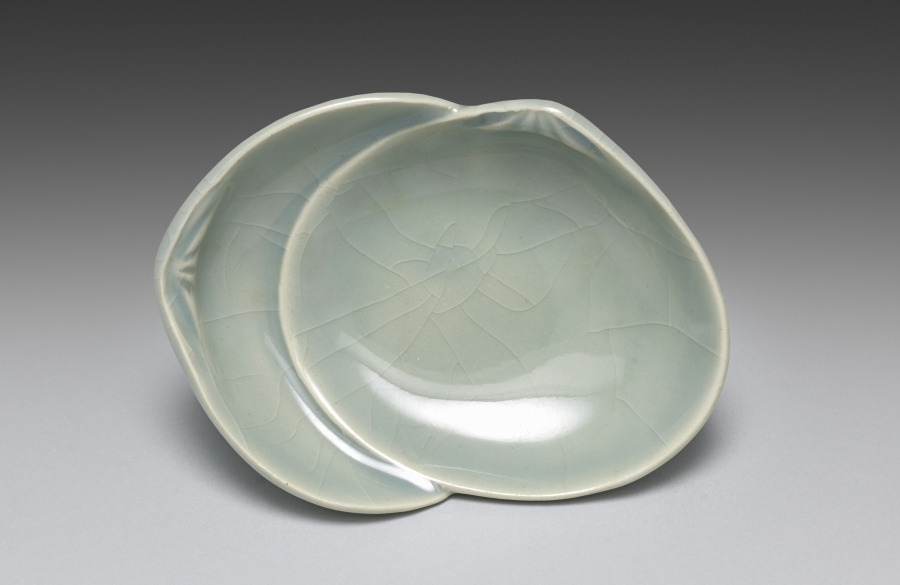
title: Dish from Saucers with Matching Shells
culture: Japan, Meiji period (1868–1912)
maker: Seifū Yohei III (Japanese, 1851–1914)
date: 1893–1914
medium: Porcelain with molded design and green crackled glaze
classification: Ceramic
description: Yohei III’s main output for his sophisticated clientele was in the form of tea sets and dining sets. He created a range of dishes in green glazes. He often produced in pairs, sets of five, or sets of ten. The set of five dishes with a more complex form is described as having a “water-colored glaze” (mizuiroyū). These are shaped like clam half shells, a reference to a game in which shell halves painted with narrative scenes or a variety of motifs must be matched back together by the players. The dishes have molded details to articulate the shell forms, and the crackling across each shell adds another dimension to the surface. Each dish is set on three small feet, formed by a pinched piece of clay and attached to an unglazed area on the underside of the dish. Curiously, while four of the dishes are stamped with the artist’s mark, one has instead a signature carved into the base.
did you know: Each of the paired-shell dishes has its own compartment in a long, flat box.